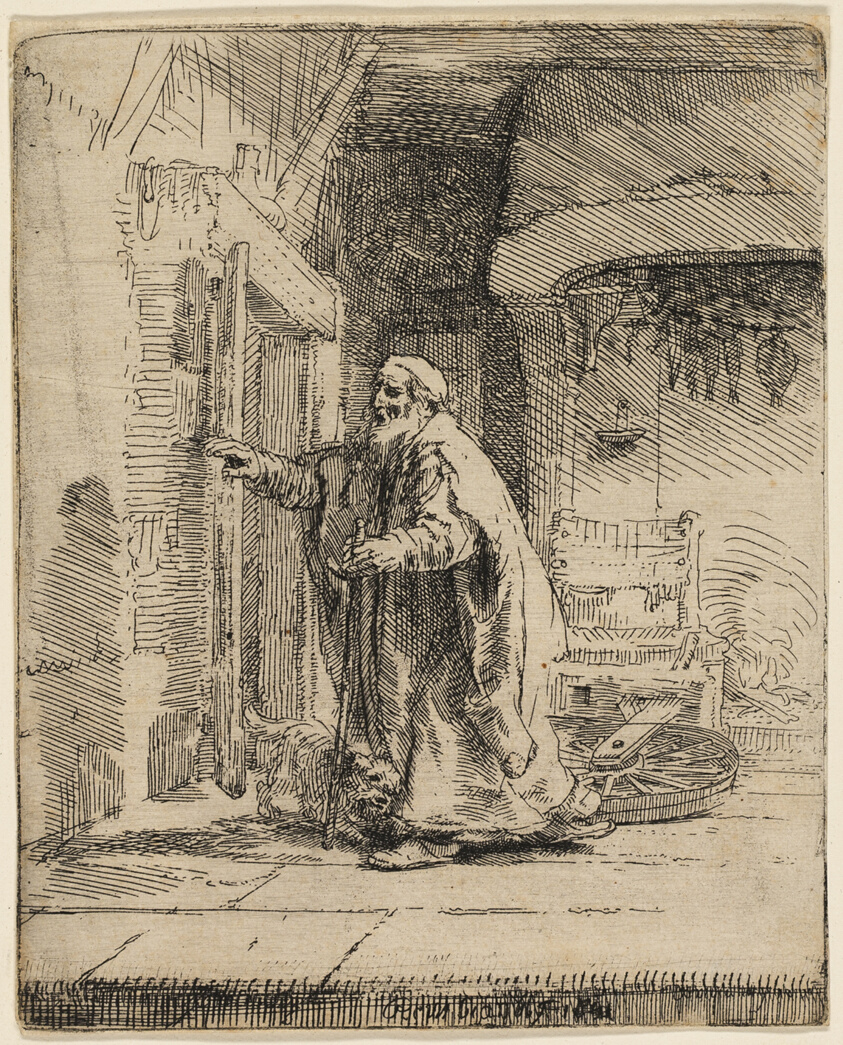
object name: Print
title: The Blindness of Tobit: The Larger Plate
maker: Rembrandt van Rijn (Dutch, 1606-1669)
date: 1651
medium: Etching with drypoint on ivory laid paper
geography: Holland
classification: etching; print; prints and drawing; paper